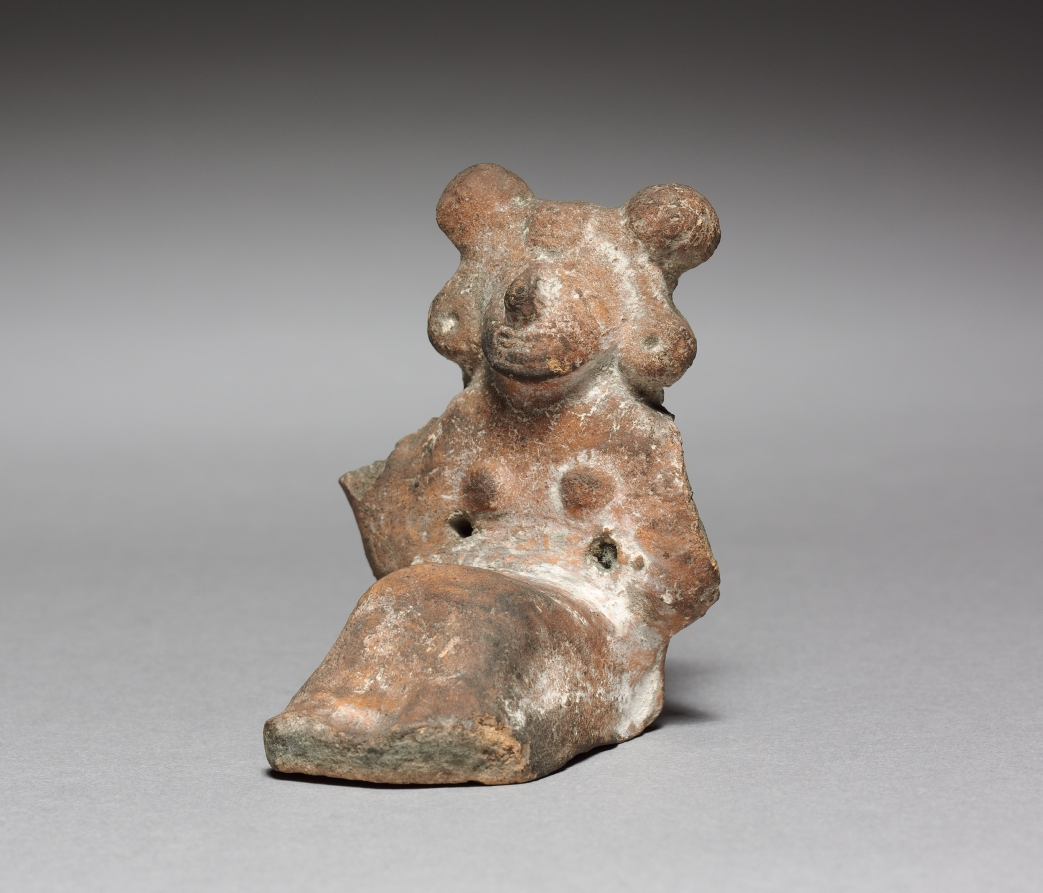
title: Figurine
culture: Mexico, Aztec, 14th century-16th century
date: 1325–1521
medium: terracotta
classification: Ceramic